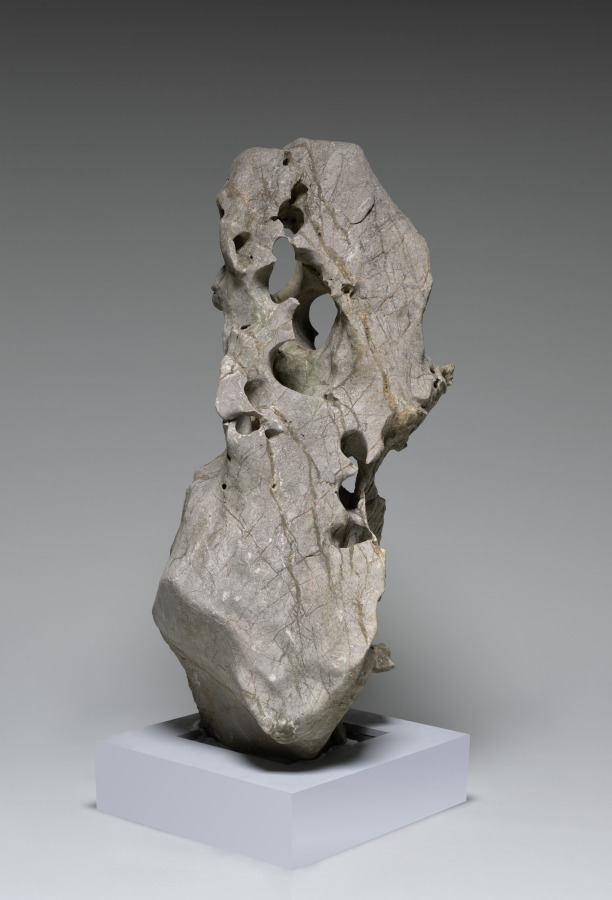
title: Taihu Garden Stone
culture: China, Jiangsu province, Wuxi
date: 0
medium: Limestone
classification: Stone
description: In China, rocks are considered elements of nature that possess spirit and life energy. With its upward winding masses, perforations, weathered surface, and multiple viewpoints, the stone exhibits sculptural qualities and embodies constant transformation through natural forces and human intervention. A solid piece of rock, it was originally sourced from the Lake Tai region. Stones were collected, set up in gardens, or installed on scholar’s desks as miniature mountains. Traditionally, Taihu stones were the most desirable type of rock. This stone is a gift by the contemporary artist Liu Dan, known for his depictions of rocks, who calls them "the stem cells of Chinese landscape."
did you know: The donor, Liu Dan, is the most prominent and celebrated painter of rocks in contemporary China.